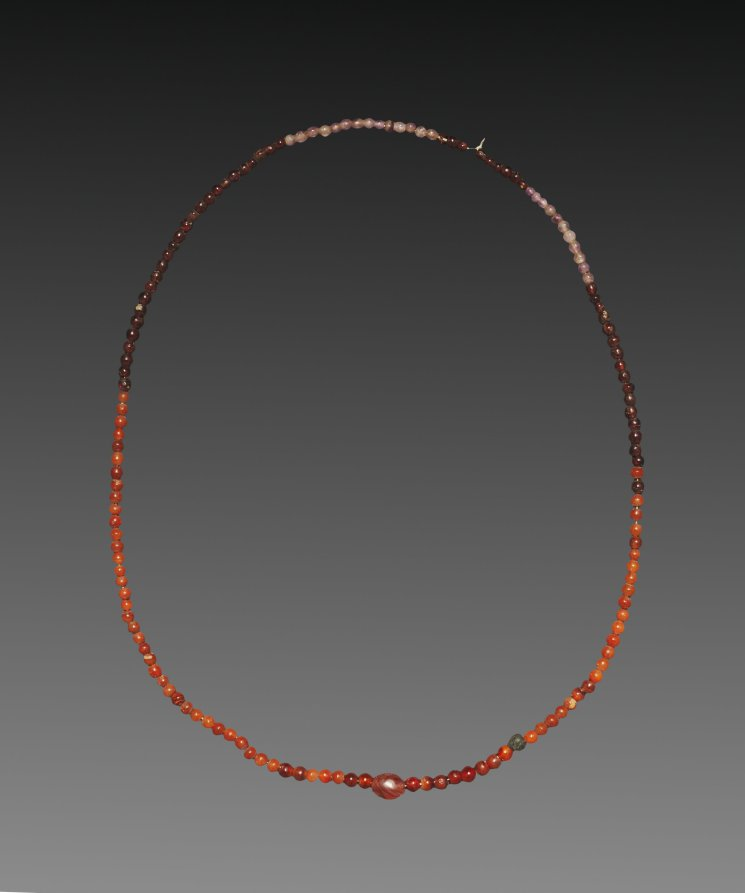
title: Necklace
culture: Egypt, Middle Kingdom (2040–1648 BCE)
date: 2040–1648 BCE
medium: garnet, amethyst, and carnelian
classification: Jewelry